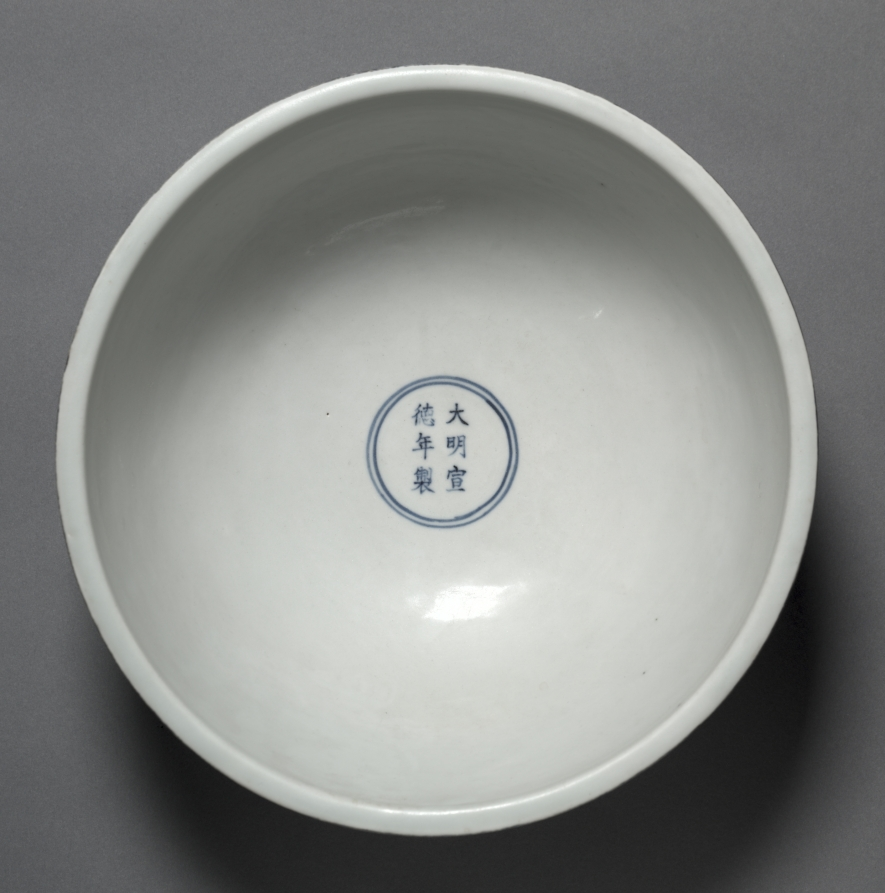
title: Dice Bowl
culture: China, Jiangxi province, Jingdezhen, Ming dynasty (1368-1644), Xuande mark and period (1426-1435)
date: 1426–35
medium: porcelain with mottled blue glaze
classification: Ceramic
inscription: 大明宣德年製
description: The Chinese connoisseurs use the poetic term "snowflake blue" to describe the mottling effects of white blotches amid tones of blue colored with cobalt oxide. Such aesthetic effects were achieved by blowing the glaze through a bamboo tube onto the ceramic surfaces.